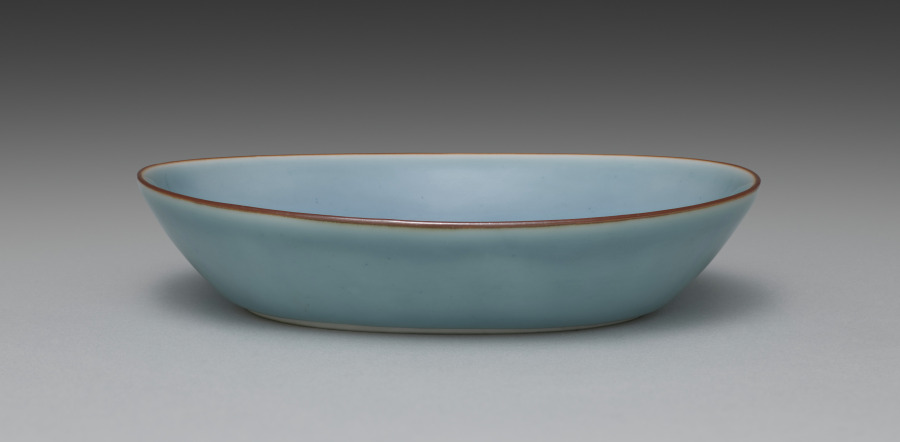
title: Dish from Dishes with Shells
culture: Japan, Taishō period (1912–26)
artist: Seifū Yohei IV (Japanese, 1872–1951)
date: 1914–46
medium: One from a set of five dishes; porcelain with blue glaze, iron oxide, and molded design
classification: Ceramic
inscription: 清風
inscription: 清風造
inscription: 清風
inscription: 成山清風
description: Yohei IV chose an aquatic theme for this set of five mukōzuke, side dishes. He added an iron oxide rim and used a concentrated blue glaze on both the interior and exterior. The glaze, named on the box lid, is his father’s “evening moon” (tsukiyoi) color. The conch in relief takes up the entire bottom of the dish. Up the sides are two snails on one end and on the other a scallop. This results in a boldly graphic, less realistic effect.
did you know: This set of dishes, mukōzuke, could be used for serving small side dishes at a tea gathering.